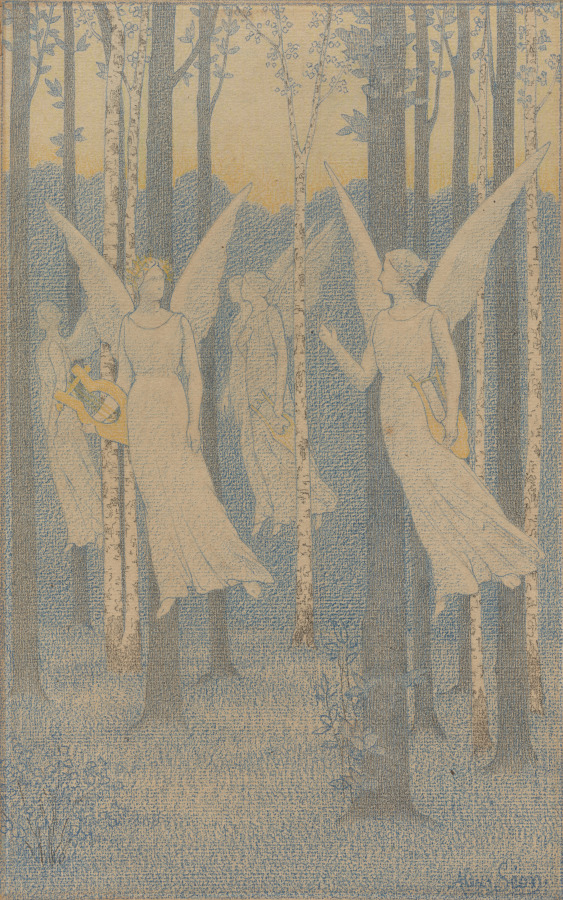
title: Study for “In the Woods, Evening”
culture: France, 19th century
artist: Alexandre Séon (French, 1855–1917)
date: 1892–94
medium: colored pencils on beige laid paper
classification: Drawing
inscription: inscribed, lower right, in blue pencil: Alex Séon; on verso, along top margin, in pencil: Alexandre SEON 1855–1917 / elève de Puvis de Chavannes ¬– la secheresse / de son dessin et sa stylization glacée, s’allient / à la tendresse de son couloris – / [4527]; on verso, on tape at right center, in pencil: 3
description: In this drawing of nymphs holding lyres, Alexandre Séon hoped to depict, in his words, “the spirit of the forest.” He was inspired by fairy-tales he heard as a child about the woods near the remote village where he grew up. By applying colored pencils to a roughly textured sheet of paper, Séon evoked the hazy tones of twilight and gave the sheet a dreamlike tenor.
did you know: This drawing relates to a painting that was exhibited to critical acclaim at the 1894 Société nationale des Beaux-Arts—an important avant-garde exhibition—but is lost today.